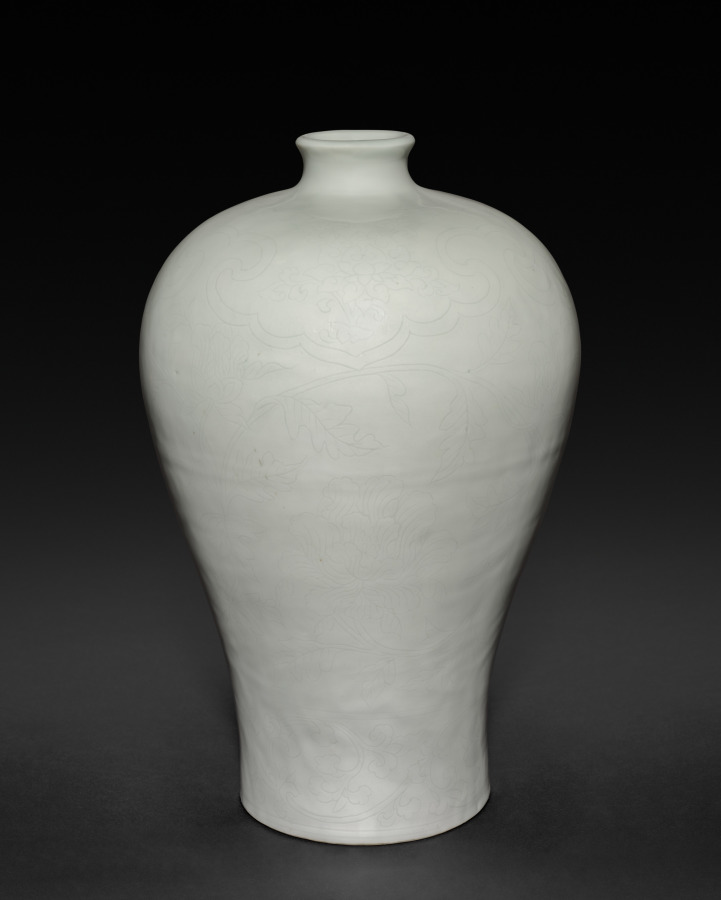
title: Meiping Vase with Cloud Collars and Peony Sprays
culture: China, Jiangxi province, Jingdezhen kilns, Ming dynasty (1368-1644), Yongle period (1403-1424)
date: 1403–24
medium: porcelain with incised decoration and white glaze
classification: Ceramic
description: This beautiful vase, called a meiping, is a testimony to the extremely high standards demanded for imperial white porcelain of the Yongle period. It is exquisitely potted and subtly decorated with "hidden decoration" (anhua) incised into the body. The clear glaze over the white body has a luster and purity; the white color radiates with a soft glow like melting snow, described by the Chinese connoisseurs as tianbai, or "sweetwhite." Tianbai wares were produced for use in imperial offerings and have always been considered a great achievement of the Yongle period.